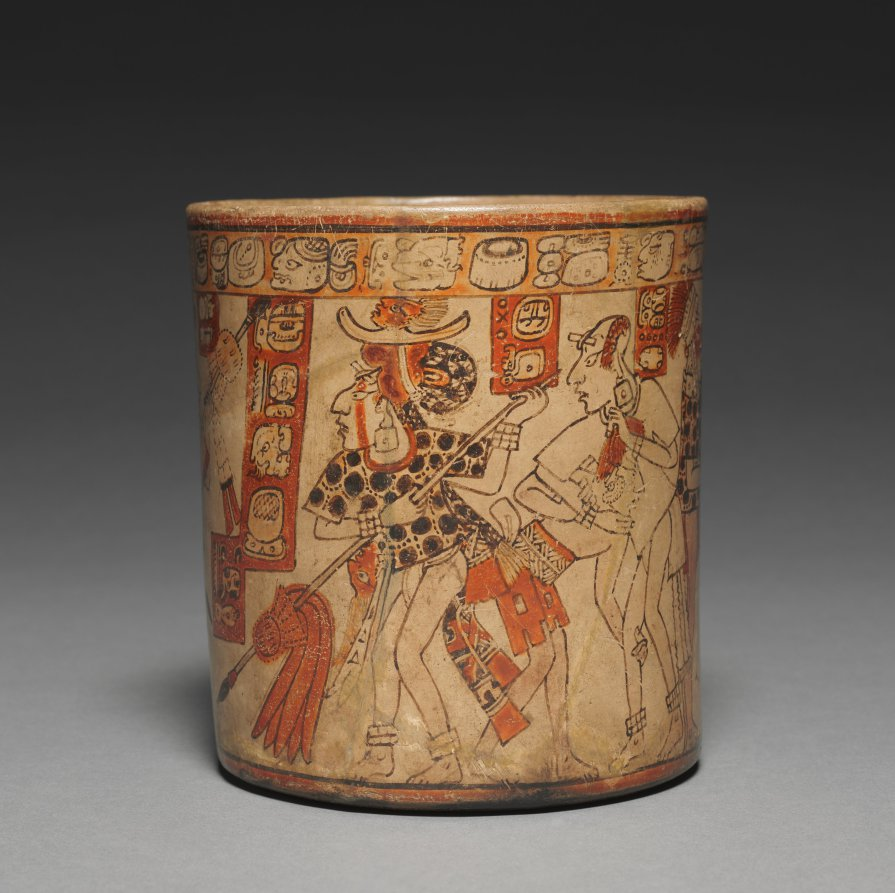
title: Vessel with Battle Scene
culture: Mesoamerica, Maya, Nebaj region, Late Classic Period, 7th-10th century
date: 600–900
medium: ceramic and slip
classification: Ceramic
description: Likely used as a political gift, this vessel depicts the presentation of prisoners in the aftermath of battle. A front-facing lord turns to review ten elegantly drawn warriors, some stripped of battle regalia and others dressed in elaborate headgear and garments, including tunics made of jaguar pelts. The hieroglyphs encircling the rim dedicate the vessel, used to drink an elite beverage made of cacao (chocolate) beans.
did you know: The Maya drank a chocolaty beverage with a spicy kick! Made using cacao seeds and chili peppers, the drink was consumed out of vessels like this one.